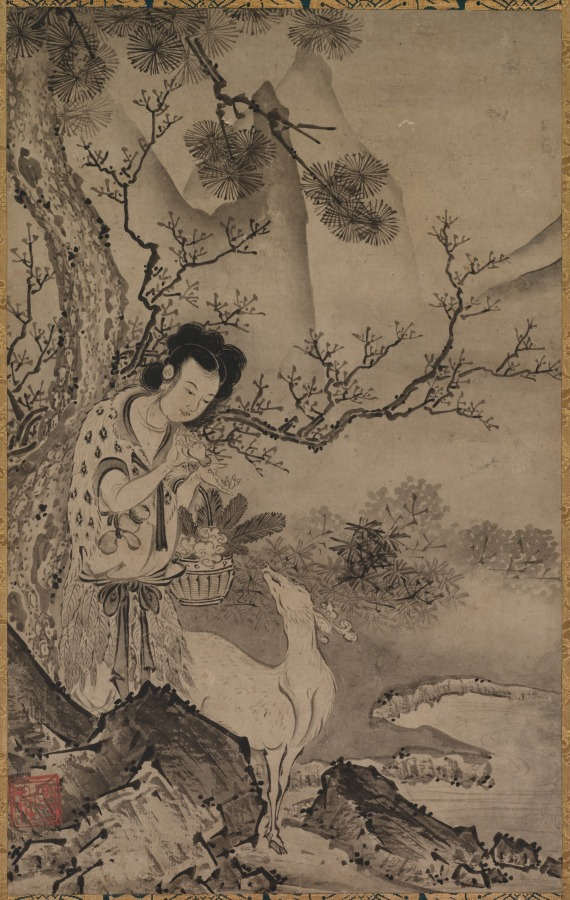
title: Female Daoist Figure in Landscape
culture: Japan, Muromachi period (1392–1573)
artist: Kōboku (Japanese)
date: early 1500s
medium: hanging scroll; ink on paper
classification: Painting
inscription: 「興牧」（朱文方印）